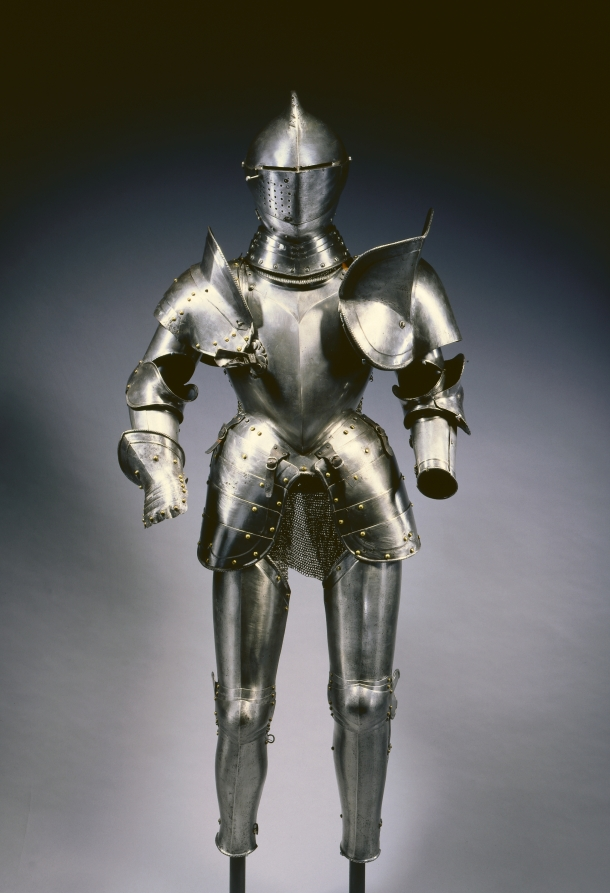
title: Tilting Suit (composed)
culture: South Germany, 16th century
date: c. 1560–80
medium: steel, leather straps, brass rivets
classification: Arms and Armor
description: This armor was developed for the joust-a sporting combat between two mounted contestants. Although all of the elements of this armor date from the same period, they are not all from the same suit. This armor is thus called "composed." It also shows the asymmetry of jousting armor. The participants rode along a wall-like barrier known as a "tilt" with their left sides facing one another. Consequently, armor on that side of the body had to be thicker. Note the large plate (grandguard) over the left shoulder for extra protection. Also, the breathing holes in the helmet were placed on the right side (farthest from an opponent's lance) to avoid injuries from splinters. The bracket attached to the right breastplate is called the lance-rest, a shock-absorbing support designed to accommodate the lance when "couched" under the right armpit.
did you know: Currently only the helmet of this suit is displayed in the museum's armor court; although both helmet and suit came into the collection together they do not belong together.